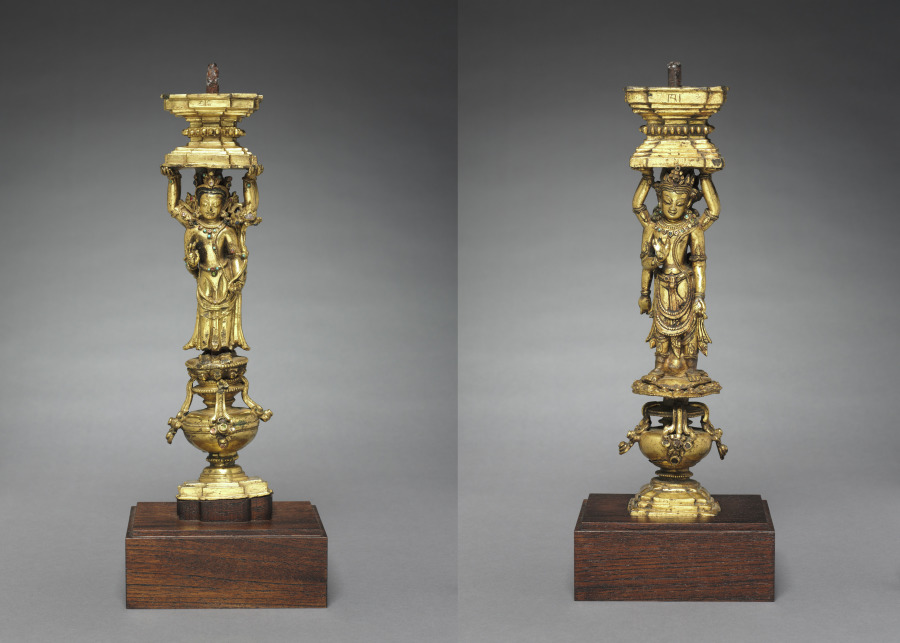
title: Supports with Addorsed Figures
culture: Tibet, Densatil Monastery, 15th century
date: 1400s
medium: gilt bronze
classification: Sculpture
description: These small pillars were part of the multitiered bases of stupas—sacred Buddhist monuments. The figures that faced toward the viewer are four-armed bodhisattvas—beings on the path to perfect enlightenment. The Tibetan syllable carved at the top of the moldings denotes the position where this piece belongs in the series of other small double-sided pillars. The figures on the opposite sides, facing the stupa and unseen by visitors, are figures of four-armed goddesses who make offerings of music or gifts to the stupa. On these examples, one plays a drum; the other holds a lotus. The figures stand on the center of a lotus flower that emerges from an overflowoing pot of abundance. Such imagery indicates that the faithful veneration of this monument will bring productive and abundant good results.